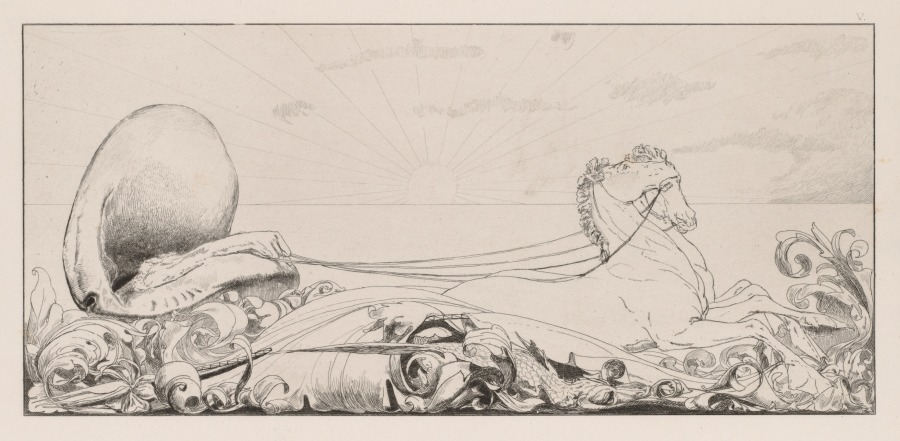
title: A Glove: Triumph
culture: Germany, 19th century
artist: Max Klinger (German, 1857–1920)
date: 1880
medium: etching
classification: Print